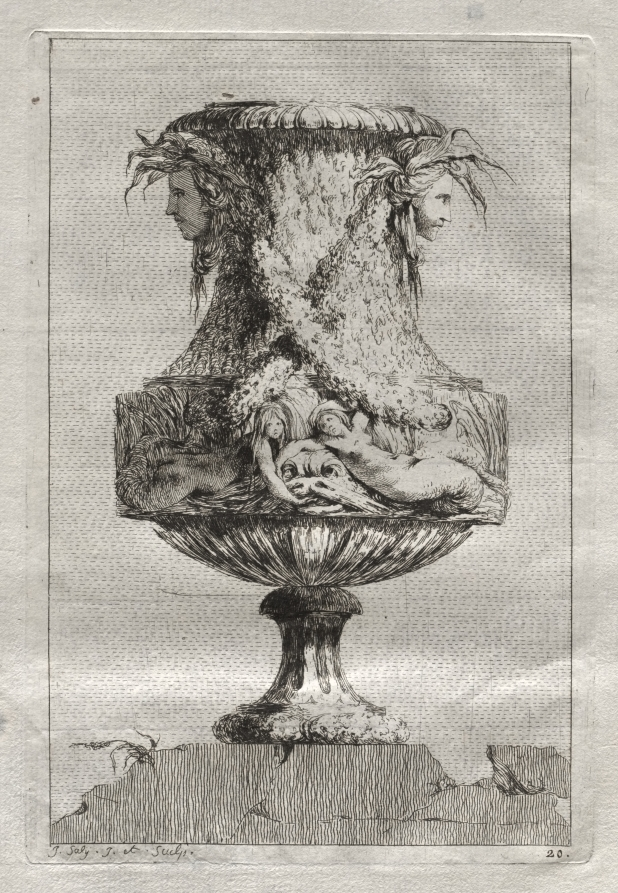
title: Suite of Vases: Plate 20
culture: France, 18th century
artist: Jacques François Saly (French, 1717–1776)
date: 1746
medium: etching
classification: Print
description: Designing ornamental vases or urns was particularly popular during the mid-18th century since the only limit to the possibilities was the imagination of the artist. Saly, a sculptor by training, was a student at the French Academy in Rome from 1740 to 1746, at which time he published a set of 30 etchings. Saly began with basic antique vase forms but deviated from classical ornament to use a rich variety of fantastic creatures for embellishment.